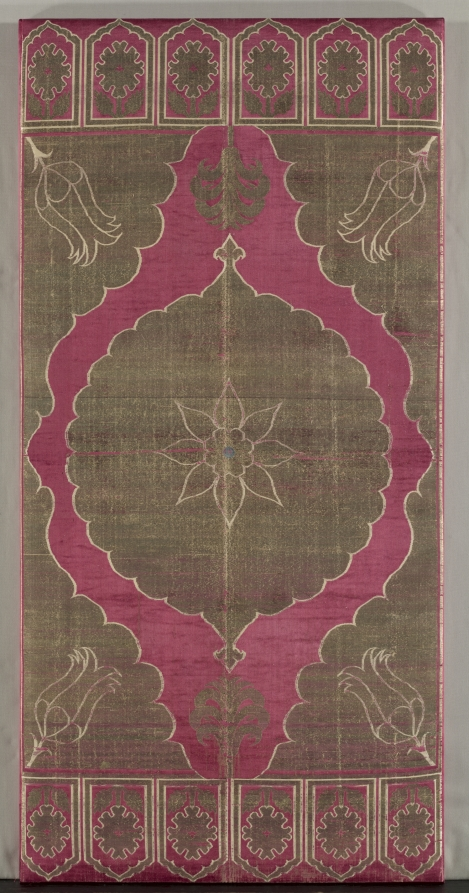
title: Lampas silk cushion cover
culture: Turkey, Istanbul or Bursa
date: early 1600s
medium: lampas: silk and gilt-metal thread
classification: Textile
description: Cushion covers, associated with comfort, were made especially to cover cushions placed on divans, the equivalent of sofas. Most were woven in brocaded velvet because the projecting pile could withstand abrasion more effectively than this rare brocaded silk example. Cushion covers typically display a row of six lappets (flaps or folds) across each end of a field decorated with either a repeating motif or a medallion pattern as shown here. Opulent gilt-metal thread forms the elegant minimalist pattern on a lustrous crimson silk ground. All the designs—the medallion and corner medallions, central rosette, and corner tulips, plus the lappets bearing rosettes—are outlined in silhouette.